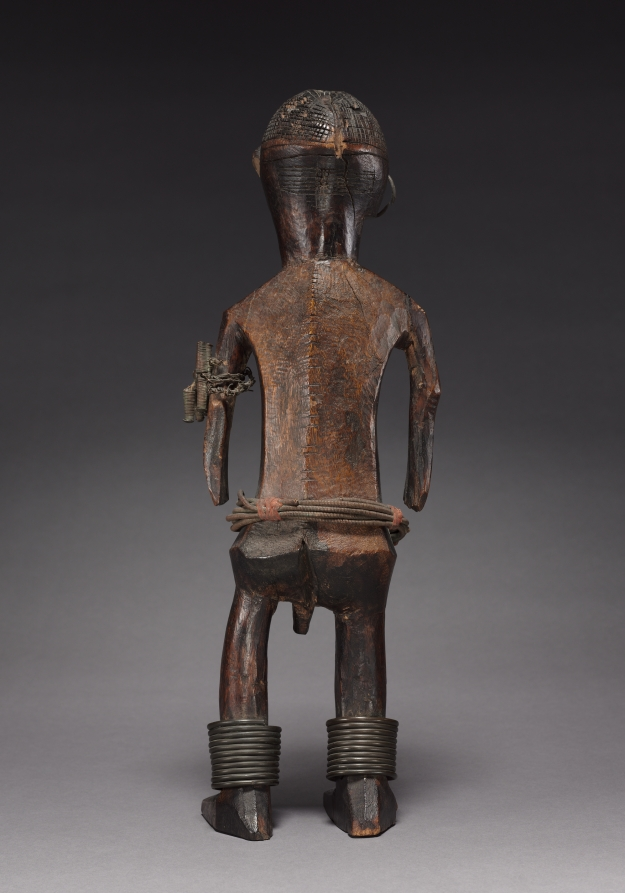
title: Male Figure of a Pair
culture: Africa, Central Africa, Democratic Republic of Congo, probably Ngbandi-style carver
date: late 1800s-early 1900s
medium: Wood, iron alloy, copper alloy, and cloth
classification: Sculpture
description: Carving of paired figures is quite well documented among the Ngbandi and its neighbors the Ngbaka-Minagende, where such sculptures are said to represent the mythical ancestor Seto and his sister-wife, Nabo. Field-based research cannot confirm the existence of figurative couples among the Ngbandi.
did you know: Odette Delenne, the collector of this pair, once stated that these figures reminded her of herself and her husband, René.